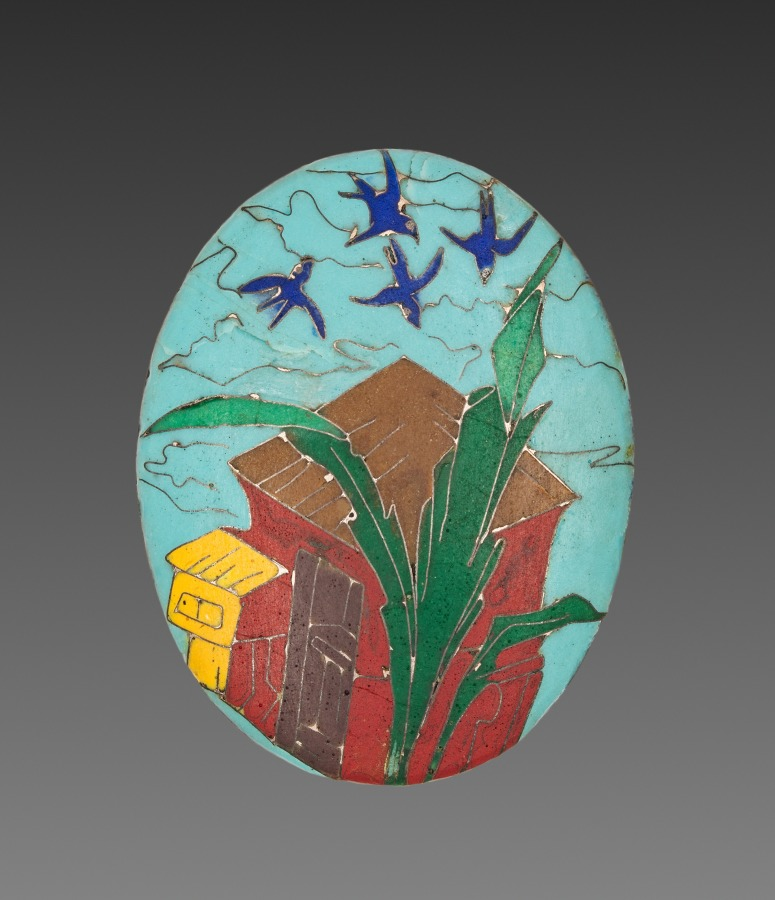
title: Set of Four Locket Panels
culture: France, 19th century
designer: Alexis Falize (French, 1811–1898)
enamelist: Antoine Tard (French, active 1860–1889)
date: 1800s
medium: gold and cloisonné enamel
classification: Jewelry